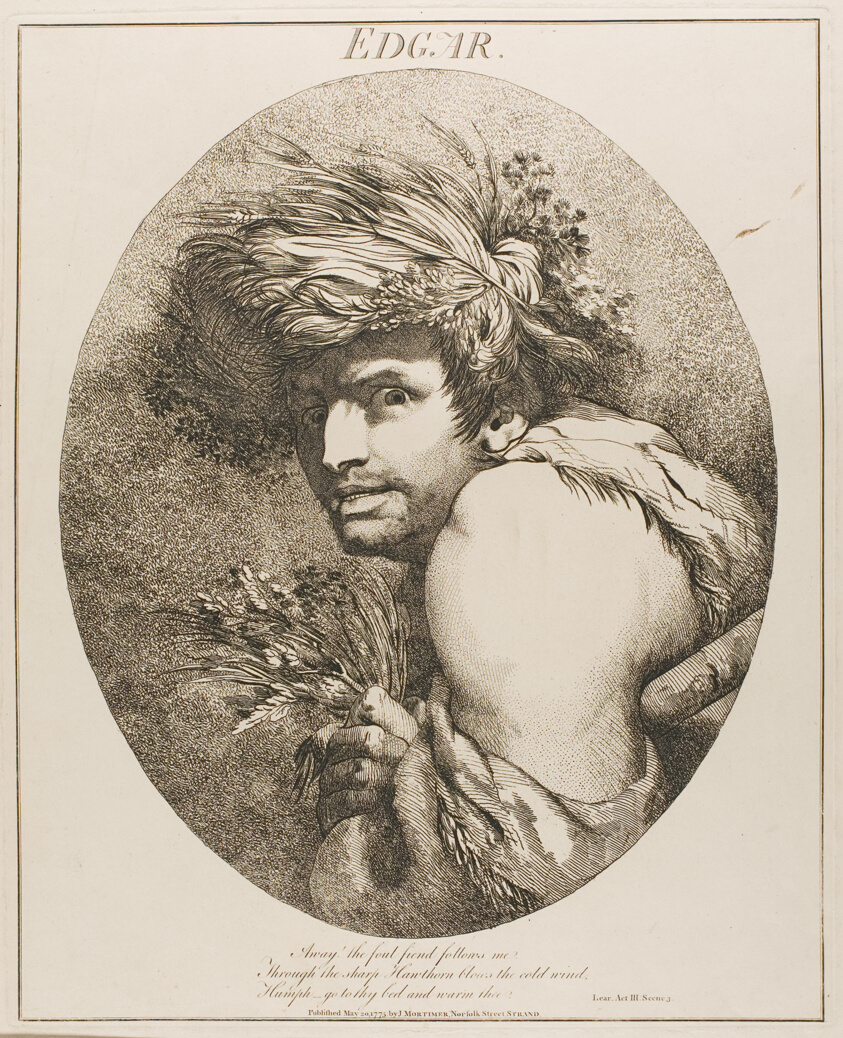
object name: Print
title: Edgar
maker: John Hamilton Mortimer (English, 1740-1779)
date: May 20, 1775; published 1809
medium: Etching on cream wove paper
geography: England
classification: etching; print; prints and drawing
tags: king lear, literature, prints and drawings